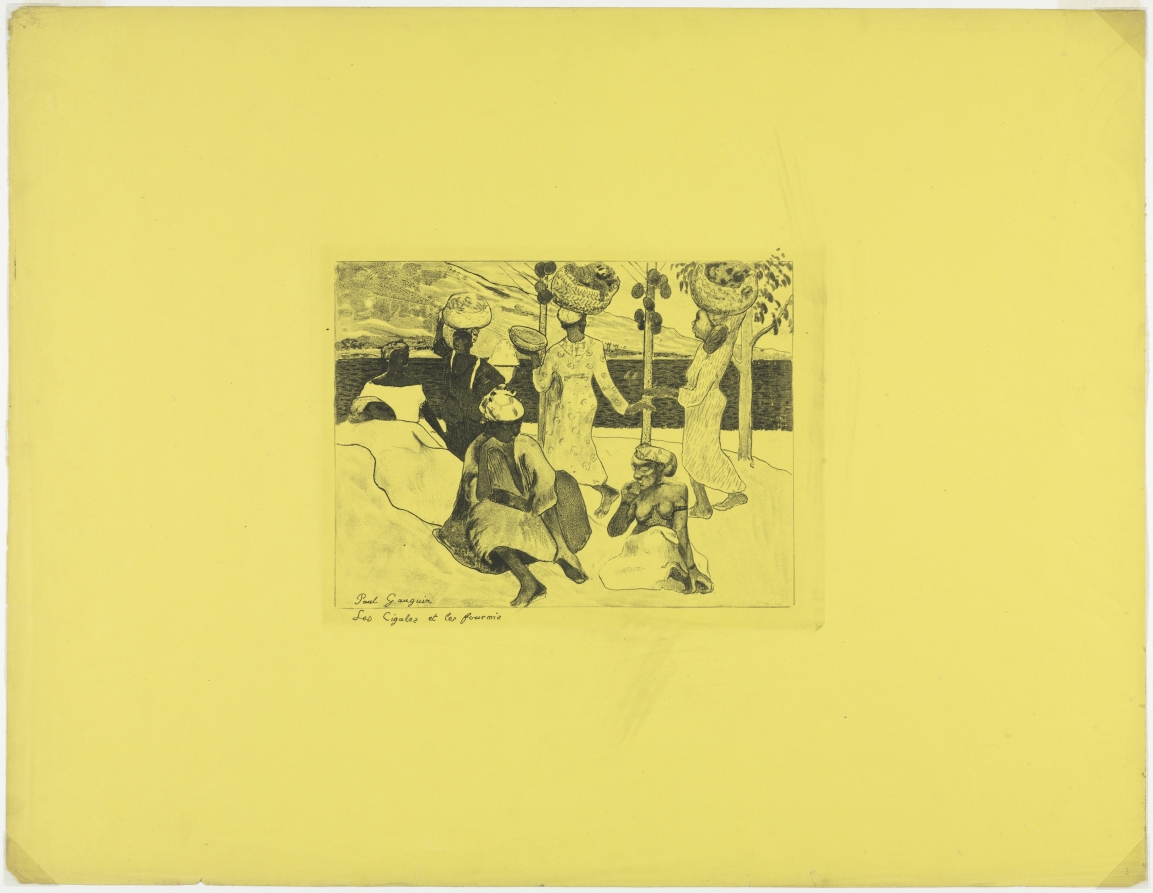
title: Volpini Suite: The Grasshoppers and the Ants (Les Cigales et les Fourmis)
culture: France, 19th century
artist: Paul Gauguin (French, 1848–1903)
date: 1889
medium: zincograph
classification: Print